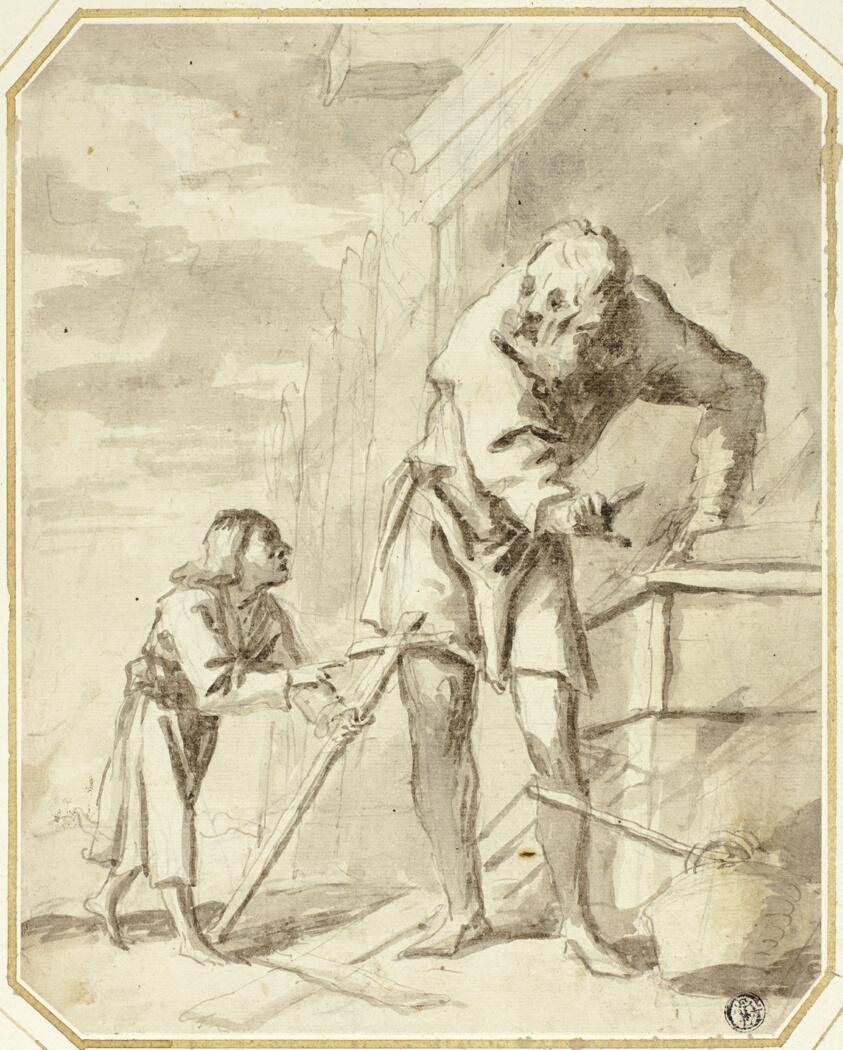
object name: Drawing and Watercolor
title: Saint Joseph with the Child Jesus in his Carpentry Shop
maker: Attributed to Pietro della Vecchia (Italian, 1605-1678); or Vecchietta (Lorenzo di Pietro di Giovanni) (Italian, 1410-1480); or the School of Alessandro Magnasco (Italian, 1667-1749)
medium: Brush and brown wash, over black chalk, on ivory laid paper, laid down on ivory laid card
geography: Italy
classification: ink or chalk wash; drawings (visual works); prints and drawing